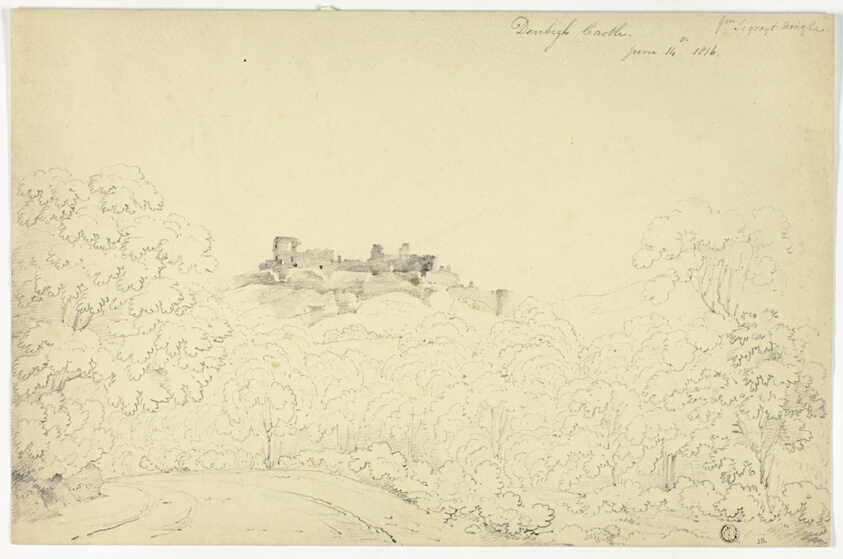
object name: Drawing and Watercolor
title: Denbigh Castle from Segroyt Dingle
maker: George Fennel Robson (English, 1788-1833); or Joseph Mallord William Turner (English, 1775-1851); or John Laporte (English, 1761-1839)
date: 1816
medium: Graphite on cream wove paper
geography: England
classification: graphite; drawings (visual works); prints and drawing